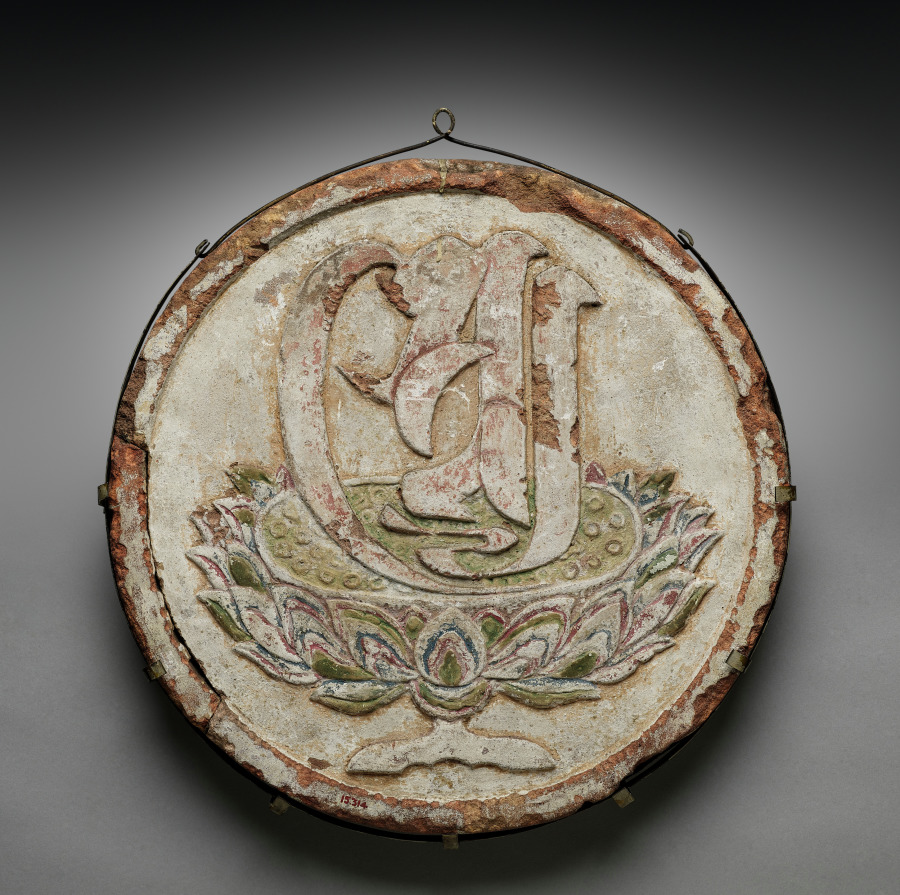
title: Monju Triad (reverse)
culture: Japan, Meiji period (1868–1912)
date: ?1868–1912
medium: Earthenware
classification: Sculpture